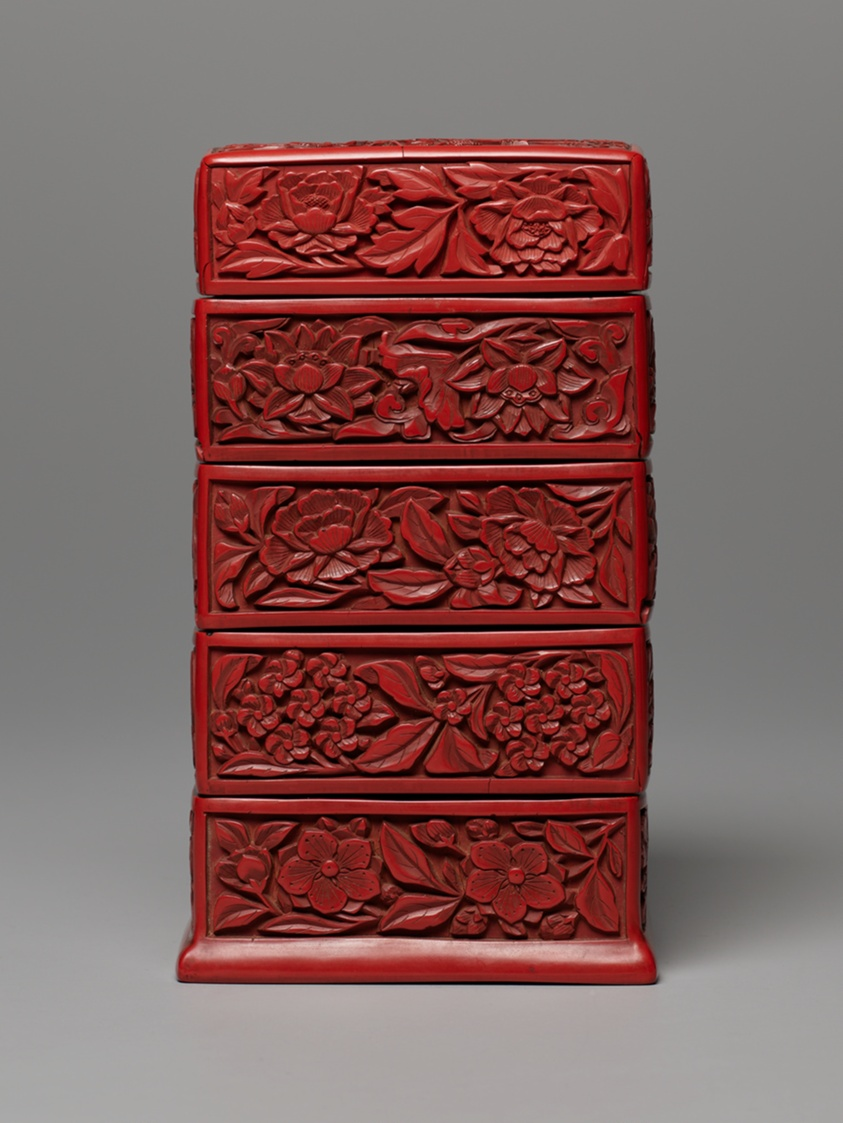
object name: Decorative Arts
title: Four-Tiered Square Box and Cover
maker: China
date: Ming dynasty (1368-1644), 16th century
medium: Carved cinnabar lacquer and black lacquer (interior)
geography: China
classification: lacquer